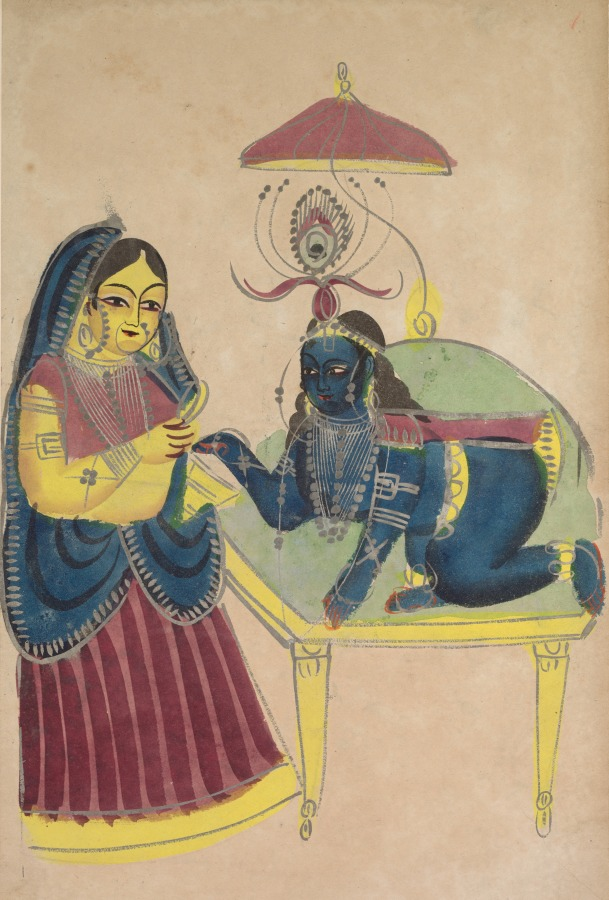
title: Baby Krishna Asking for Butter from Yashoda, from a Kalighat album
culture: Eastern India, Kolkata, Kalighat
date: c. 1890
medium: Gum tempera, graphite, ink, and tin on paper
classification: Painting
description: As the incarnation of the Hindu god Vishnu, whose followers recognize as the deity who creates and destroys the universe, Krishna was always eating. Like time itself, which ultimately consumes everything, Krishna eats so much his foster mother Yashoda cannot believe it. When she looks in his mouth, she sees the cosmos and realizes he is not an ordinary baby.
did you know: Kalighat artists made metallic pigment out of tin to look like silver.